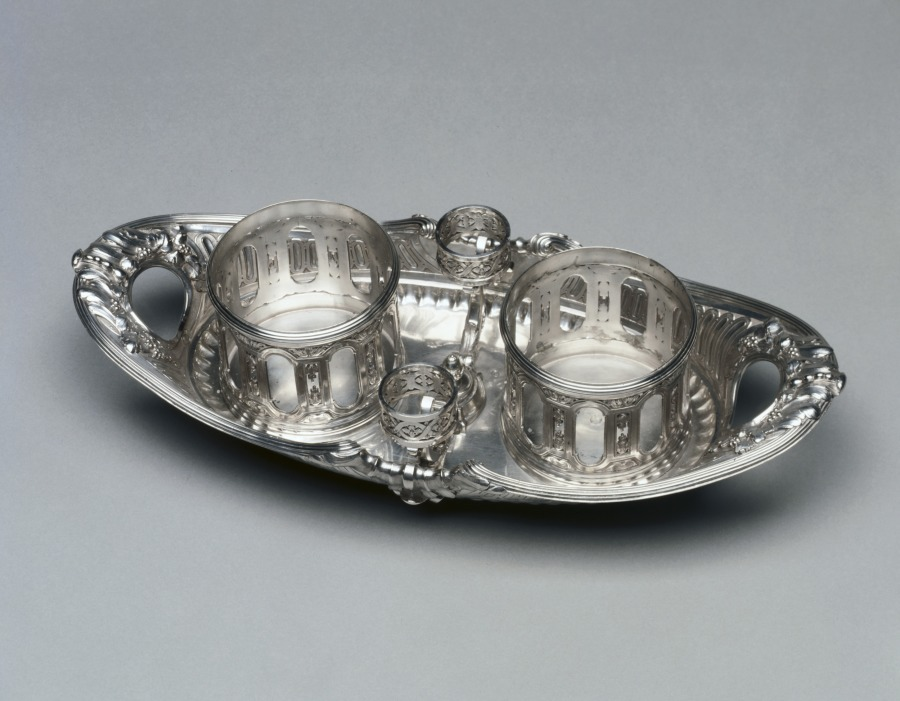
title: Cruet Stand (Huilier)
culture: France, 18th century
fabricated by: Robert Joseph Auguste (French, 1723–after 1795)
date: 1766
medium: silver and glass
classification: Silver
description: These bottles would have held oil and vinegar. Their silver stoppers, decorated with grapes and the leaves of vines, hint at their function. Master goldsmith Robert-Joseph Auguste was known for his silverwork in the neoclassical style. This style is present on the supports for these bottles whose stylized columns and scrollwork pull inspiration from the art of classical antiquity.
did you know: In 1778, Robert-Joseph Auguste received the title orfèvre ordinaire du roi, becoming the principal goldsmith for the royal court of King Louis XVI.